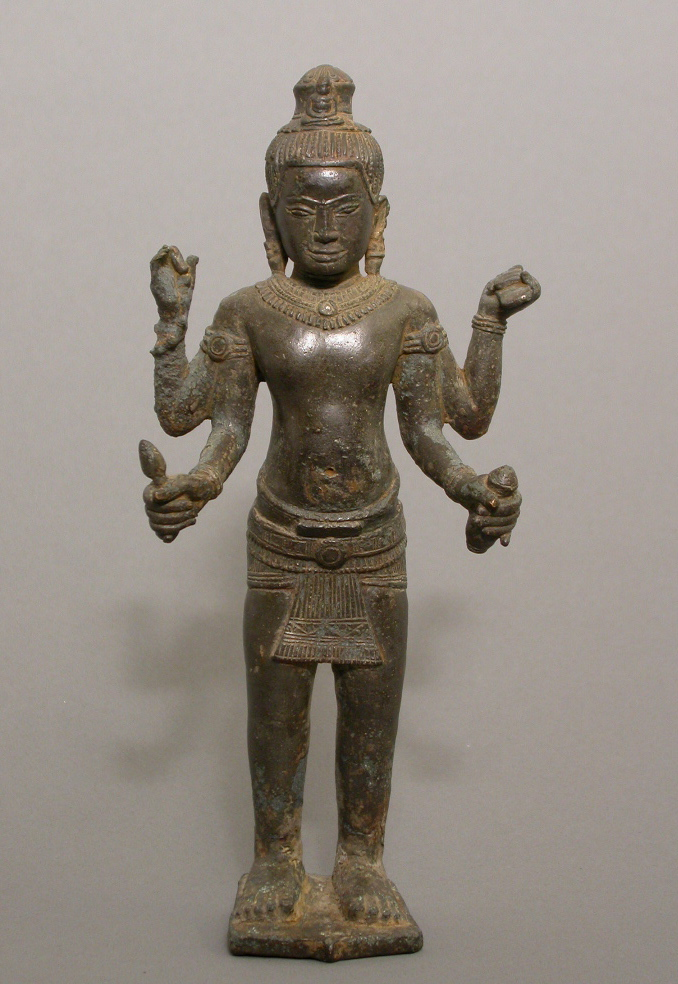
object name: Sculpture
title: Bodhisattva Avalokiteshvara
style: Southeast Asian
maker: Cambodia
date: Angkor period, late 12th/early 13th century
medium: Bronze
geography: Cambodia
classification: bronze; metal; sculpture; asian art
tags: religion, bodhisattva, Buddhism